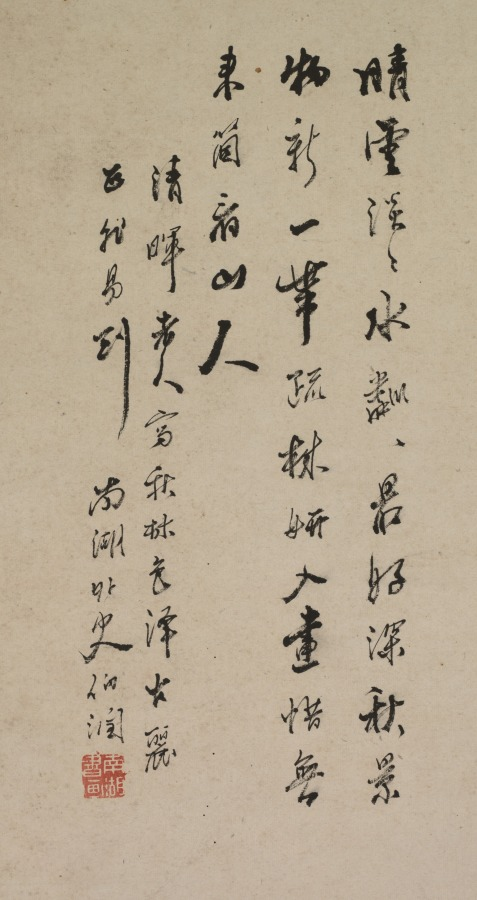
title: Autumn Landscape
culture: China, Jiaxing, Qing dynasty (1644-1911)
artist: Yang Borun (Chinese, 1837–1911)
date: late 1800s–1911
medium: hanging scroll, ink and color on paper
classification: Painting